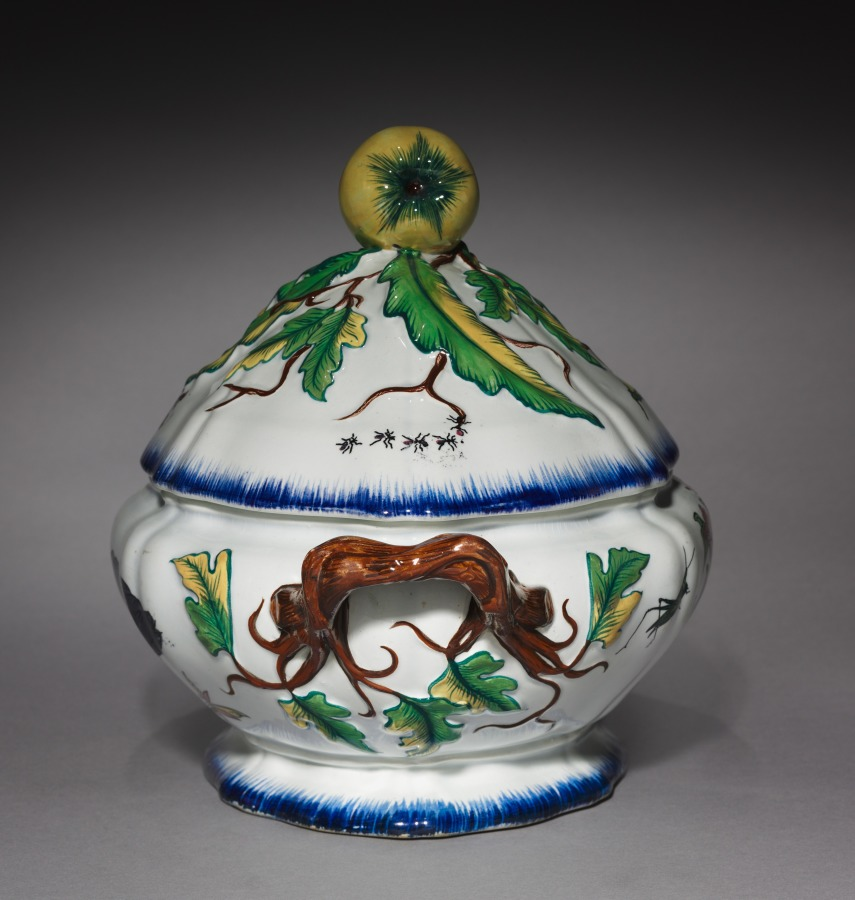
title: Covered Tureen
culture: France, Creil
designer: Félix Bracquemond (French, 1833–1914)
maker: Creil Factory (French)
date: 1866–75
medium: porcelain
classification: Ceramic